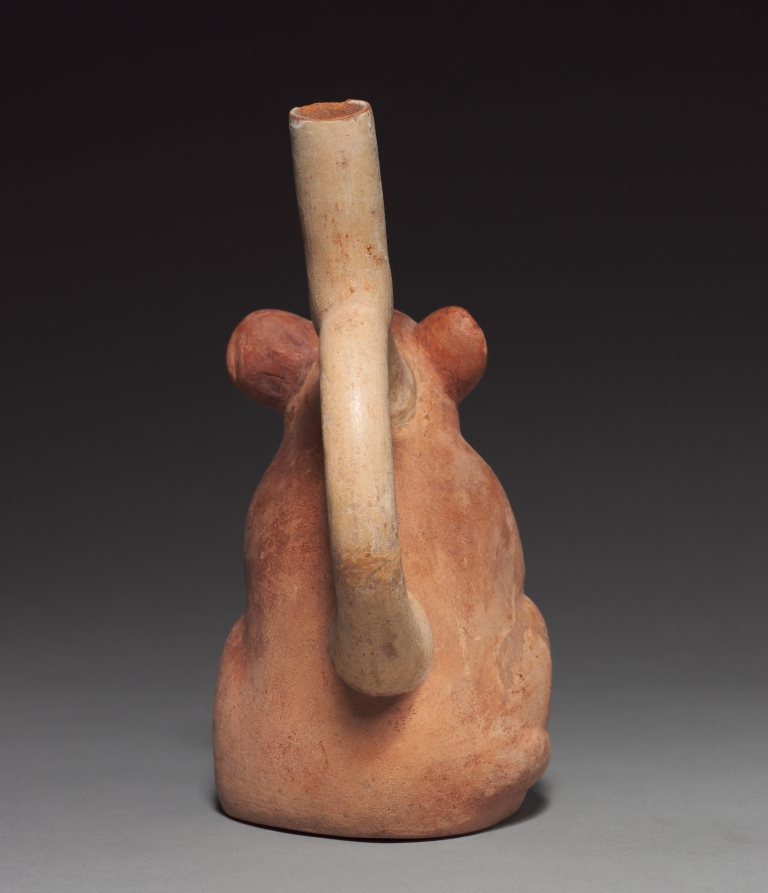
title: Rodent with Corn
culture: Peru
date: 50–800 CE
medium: pottery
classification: Ceramic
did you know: From the Moche, renowned for animal portraits, comes this rodent gnawing maize (corn).